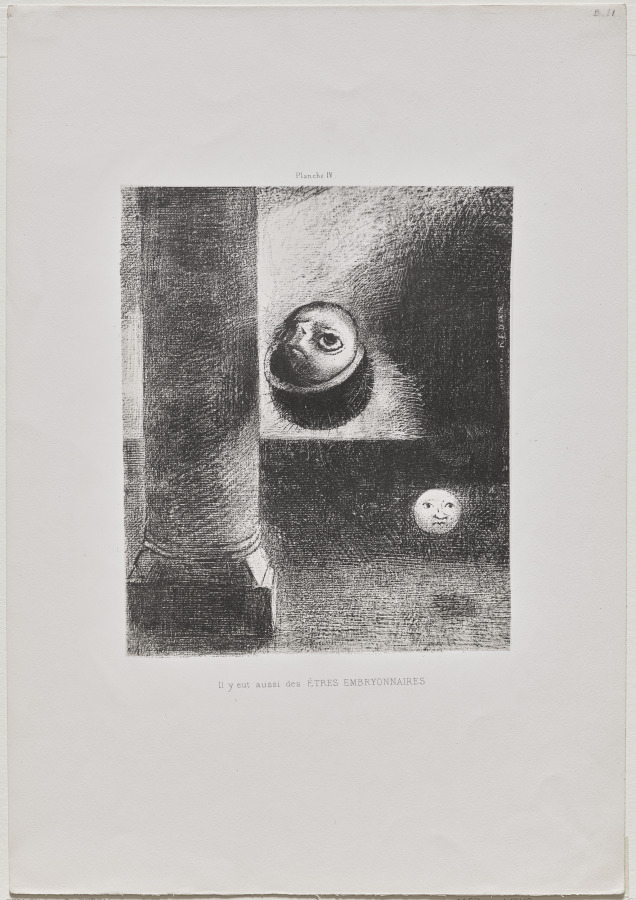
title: There Were Also Embryonic Beings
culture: France, 19th century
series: Homage to Goya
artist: Odilon Redon (French, 1840–1916)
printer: Lemercier & Cie.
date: 1885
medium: lithograph on China paper laid on wove paper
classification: Print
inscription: printed above image at center: Planche IV.; below image at center: Il y eut aussi des ÊTRES EMBRYONNAIRES.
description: This series is one of many that Odilon Redon created throughout his career. Nearly two-thirds of his lithographs took the form of portfolios—prints connected conceptually by a theme or narrative and physically by a folder or binding. Such works were often dispersed over time, but Cleveland was fortunate to acquire several complete sets with their original covers during the 1920s. Dating from Redon’s early experimentation with lithography, Homage to Goya was intended as a tribute to 18th-century Spanish master Francisco de Goya, whose interest in dreams and the subconscious influenced Redon. The six seemingly unrelated images celebrate Goya’s ambiguity and collectively suggest the introspection and isolation of artistic practice.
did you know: This portfolio was published in an edition of 50, one of which Redon sent to poet Stéphane Mallarmé soon after Redon became a frequent participant in a literary salon held regularly at Mallarmé's home.